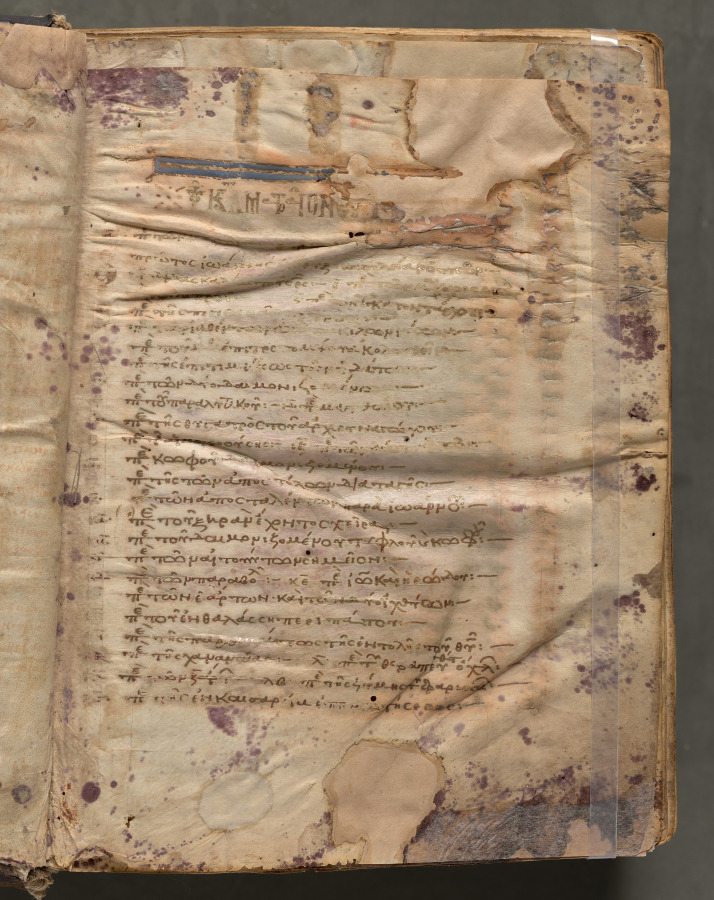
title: Text, folio 3 (recto), from a Gospel Book with Commentaries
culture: Byzantium, Constantinople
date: c. 1000–1100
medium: ink, tempera, and gold on vellum; leather binding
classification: Bound Volume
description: Each of the four gospels in this book opens on a page with brilliantly illuminated borders depicting the author of the text as well as birds-principally peacocks, symbols of the immortality of the soul-and fountains, representing the fountain of life and the salvation of the soul. This volume consists of 428 leaves with texts in Greek. Its level of sophistication suggests that it was probably written and decorated in a monastery in Constantinople.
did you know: Gospel Books were carried in procession through Byzantine churches.